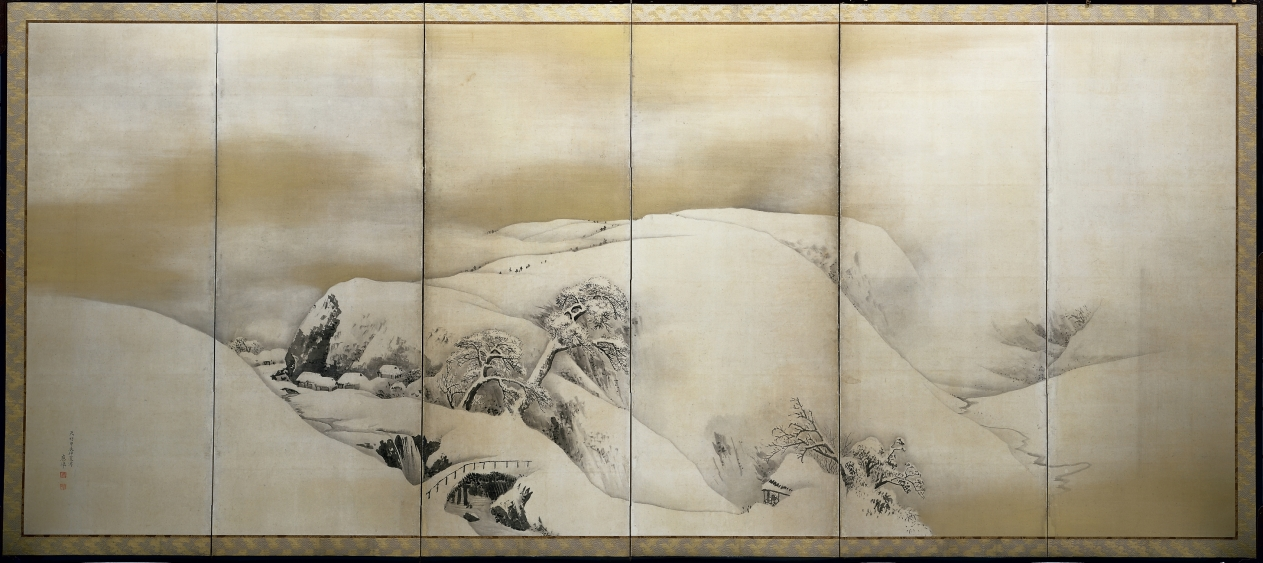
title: Winter Day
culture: Japan, Edo period (1615–1868)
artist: Maruyama Ōkyo (Japanese, 1733–1795)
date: 1784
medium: Six-panel folding screen, ink, gold, and silver on paper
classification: Painting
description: Ōkyo painted these panoramas in the summer of 1784. Regarded as Kyoto's most important painting teacher and accomplished artist, he had studied Western painting techniques, "realistic" sketching from nature, and traditional Japanese style painting (yamato-e). The naturalistic quality of these scenes results from a blend of detailed observation of nature and a remote, even detached regard for man's place in the world.